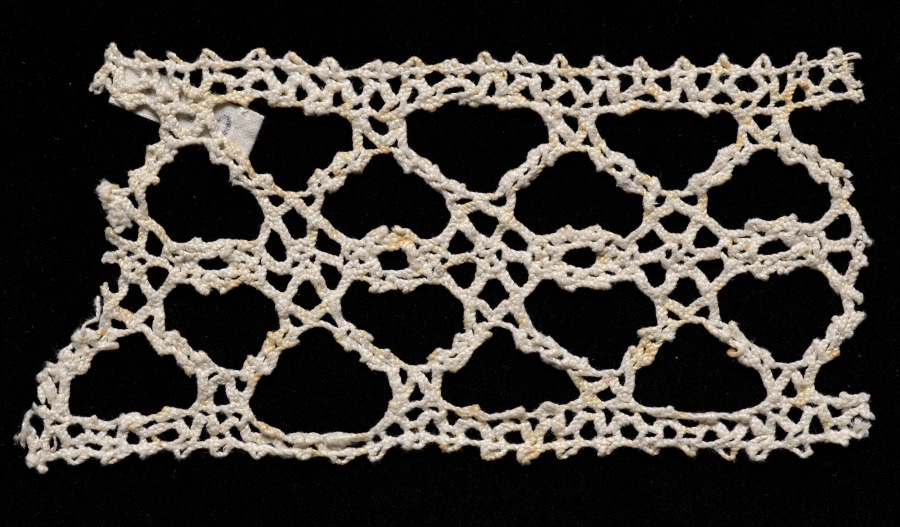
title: Lace Insertion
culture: Italy, Venice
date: 1540–60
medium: Bobbin lace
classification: Lace